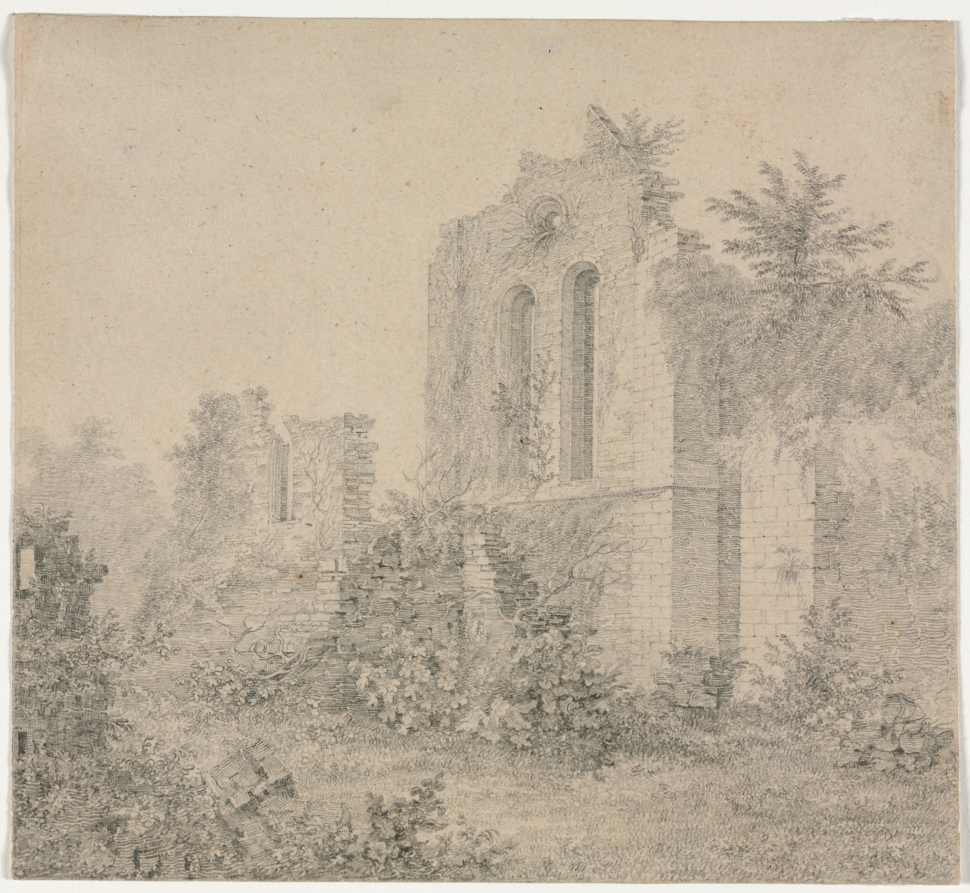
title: Ruins of an Abbey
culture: England, 19th century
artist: Charles Norris (British, 1779–1858)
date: c. 1812–58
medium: graphite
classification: Drawing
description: This drawing of an overgrown, crumbling abbey may be compared with German Romantic images of Gothic ruins by Karl Friedrich Schinkel and Domenico Quaglio (both also in this exhibition). Norris was an amateur artist who was influenced by Romantic themes of the period.